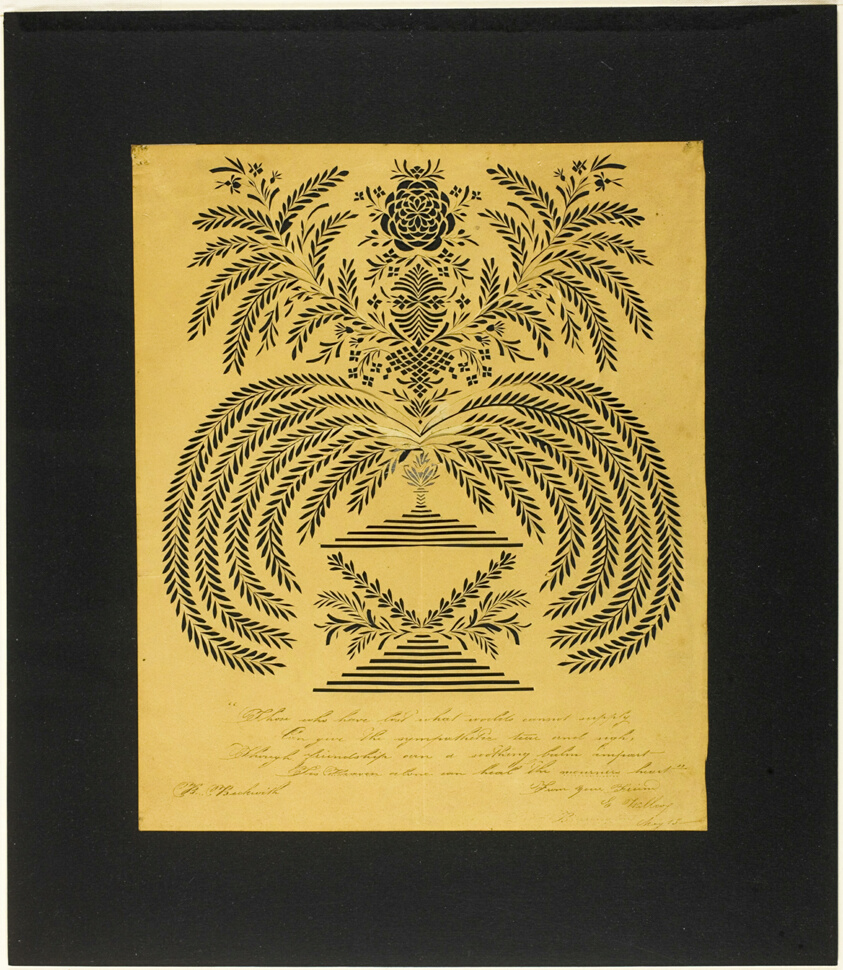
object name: Print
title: A Condolence Card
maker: Emily Wilcox (American, 19th century)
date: c. 1830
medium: Stencil in black on buff wove paper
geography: United States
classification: stencil; print; prints and drawing